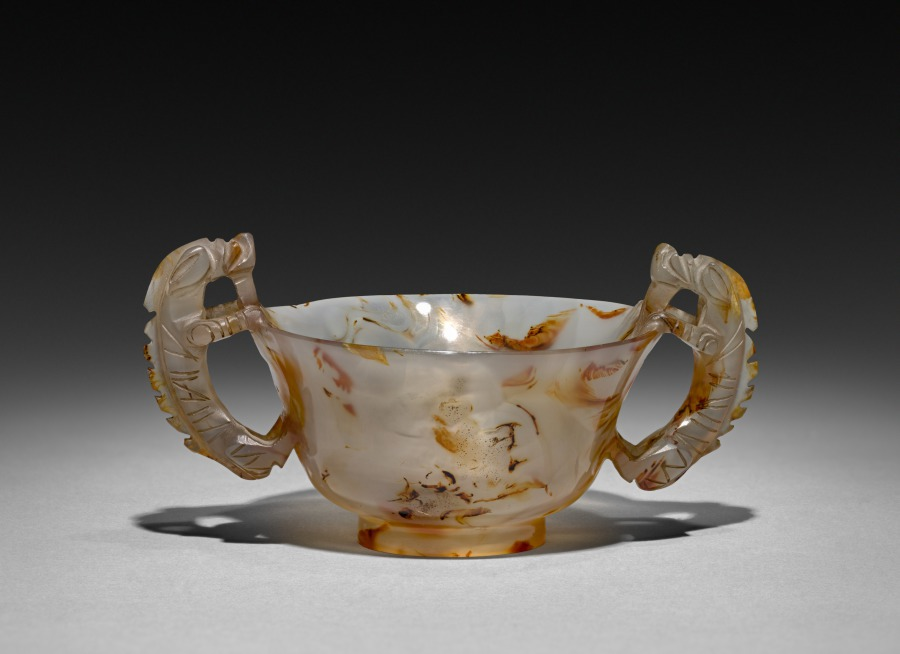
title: Libation Cup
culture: China, Qing dynasty (1644-1911)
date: 1644–1911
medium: agate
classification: Stone